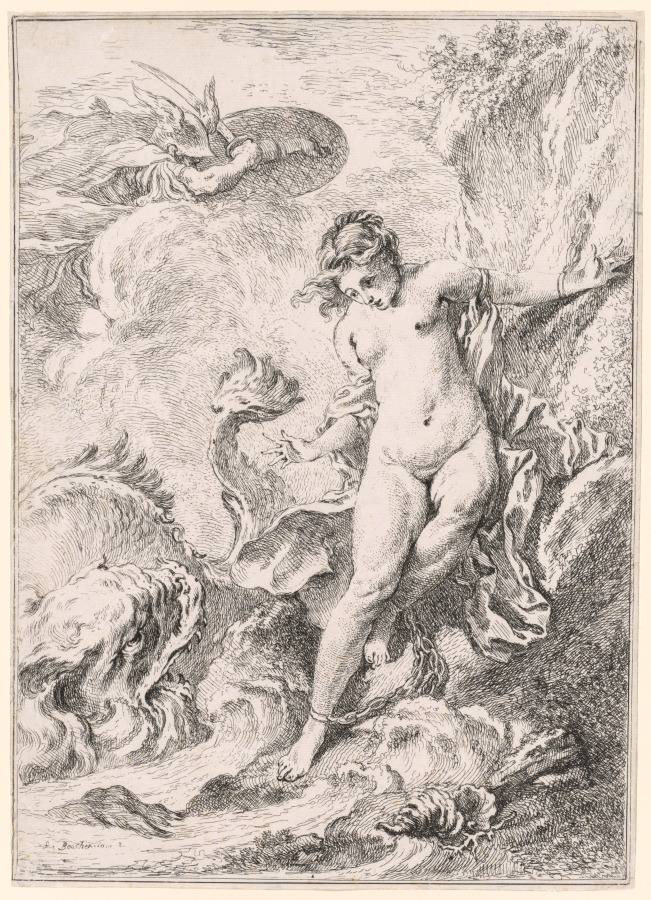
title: Andromeda (Andromède)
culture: France, 18th century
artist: François Boucher (French, 1703–1770)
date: 1734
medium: Etching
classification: Print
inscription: In plate, lower left: f. Boucher invt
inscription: Trimmed within plate mark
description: Late in life Boucher became Louis XV’s premier painter, but he began his career working as an etcher, tasked with reproducing drawings by other artists. Boucher’s effortless etching style is a testament to his excellent draftsmanship, a skill that served him well not only as a painter but as a designer of tapestries, ceramic figurines, and other decorative goods. Here, in one of his own compositions, Boucher portrays the climax of the Greek myth when Perseus swoops in to rescue the princess Andromeda, who was chained to a rock cliff as a sacrifice to the sea monster Cetus.